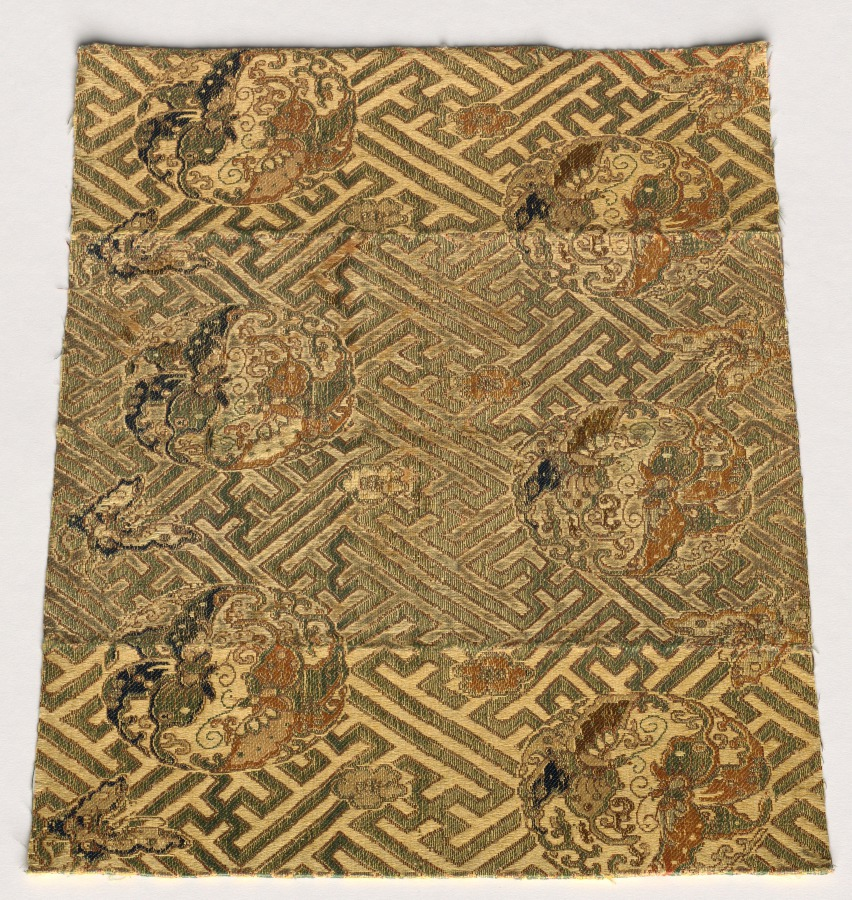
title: Fragment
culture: China, 19th century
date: 1800s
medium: silk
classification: Textile